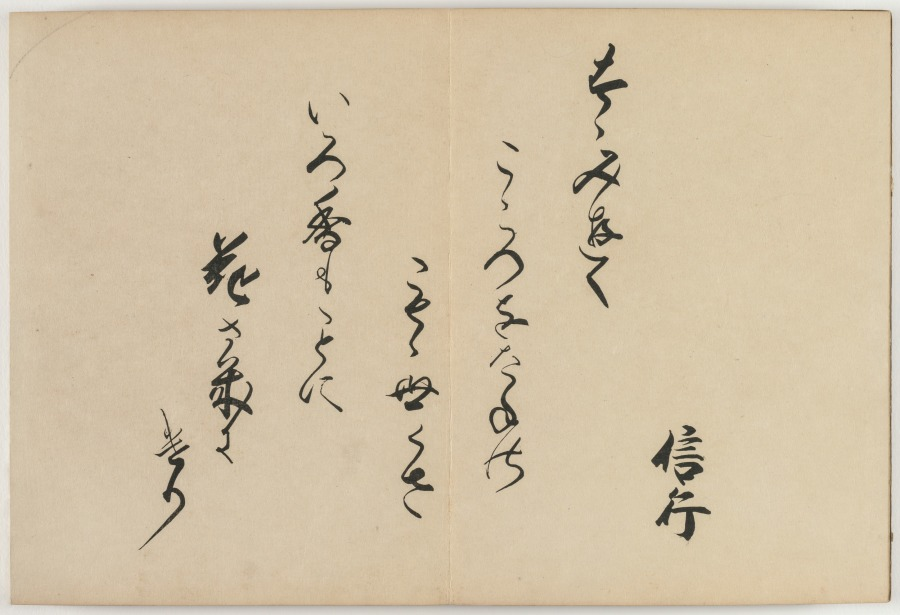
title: Flowers of a Hundred Worlds (Momoyogusa), Vol. 1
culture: Japan, Meiji period (1868–1912)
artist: Kamisaka Sekka (Japanese, 1866–1942)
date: 1909–10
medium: one of a set of three woodblock-printed folding-books; ink, color, gold, and silver on paper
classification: Bound Volume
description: This is the first of a set of three woodblock printed albums by Kamisaka Sekka, the artist considered the last major exponent of the Rinpa style of painting and design associated with the artists Tawaraya Sōtatsu (died about 1640) and Ogata Kōrin (1658-1716). Momoyogusa, in addition to meaning "flowers of a hundred worlds," is a classical name for the chrysanthemum. It appears in a poem by Mimube no Tarukuni (dates unknown) written in 755 and contained in the first Japanese imperial poetry anthology, Collection of Ten Thousand Leaves (Man'yōshū). In the poem, Tarukuni, who was posted in northern Kyushu as a guard at the time, asked a missed beloved in his home province to be well for a hundred nights, like the chrysanthemums growing in his parents' garden. Chrysanthemums are traditionally associated with longevity, and in some cases immortality. This volume of Sekka's series includes a preface poem by the Kyoto-based physician and poet Sugawa Nobuyuki (1839-1917) that may be glossed as follows: As we move forward in the spirit of the new age, "flowers of a hundred worlds" sown by seed, now blossom in distinctive colors and scents (translation by John T. Carpenter)